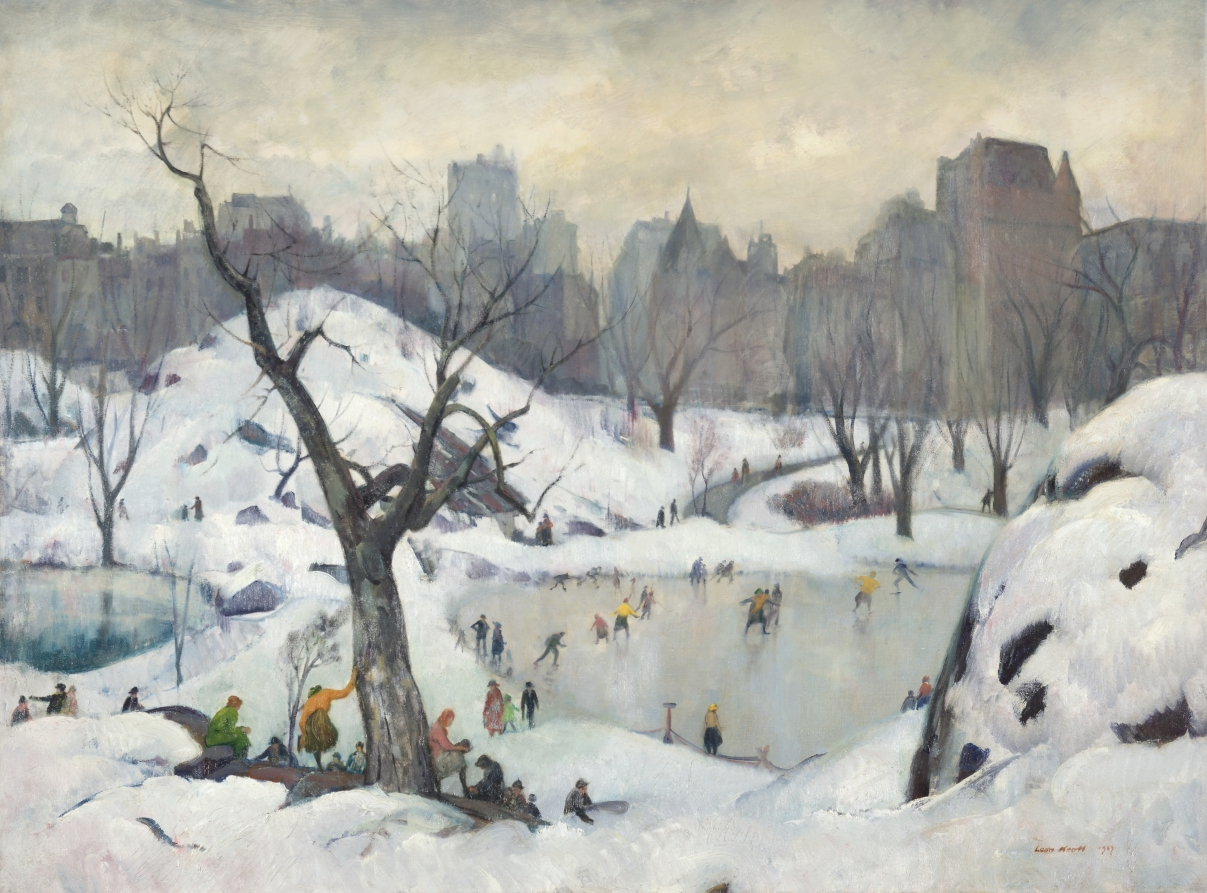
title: The Park-Winter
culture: America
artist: Leon Kroll (American, 1884–1974)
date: 1923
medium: oil on canvas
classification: Painting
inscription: signed lower right: Leon Kroll 1923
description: During the 1920s, Kroll earned a great deal of success painting scenes of everyday urban life. In this example, he depicted ice skaters on a pond in snow-covered Central Park, with a looming skyline of Manhattan apartment buildings in the background.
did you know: A fellow artist described Leon Kroll as having "the eye of a hawk and the heart of a dove."